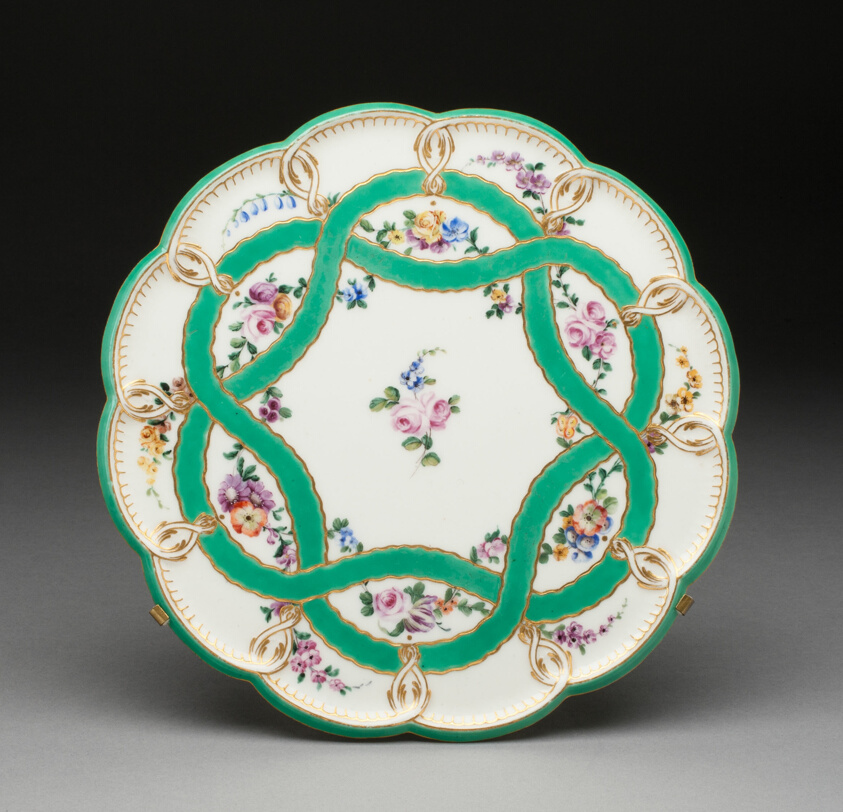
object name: Ceramics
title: Footed Tray from the Maria Theresa Service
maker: Sèvres Porcelain Manufactory; French, founded 1740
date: 1757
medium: Soft-paste porcelain, green ground, polychrome enamels, and gilding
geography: Sèvres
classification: tableware; tray; ceramics; porcelain; european decorative arts